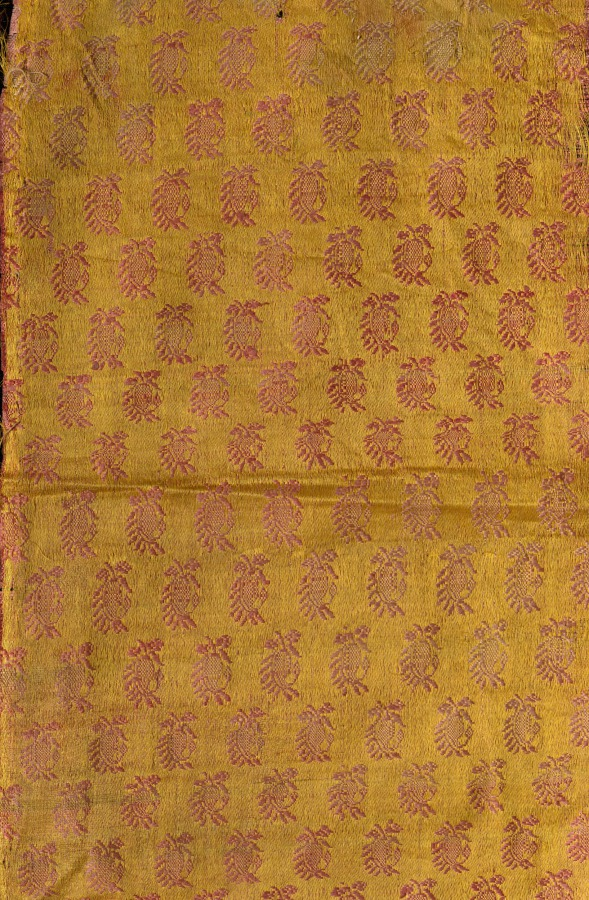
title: Brocade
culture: India, Surat, 19th century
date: 1800s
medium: brocade; silk and cotton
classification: Textile